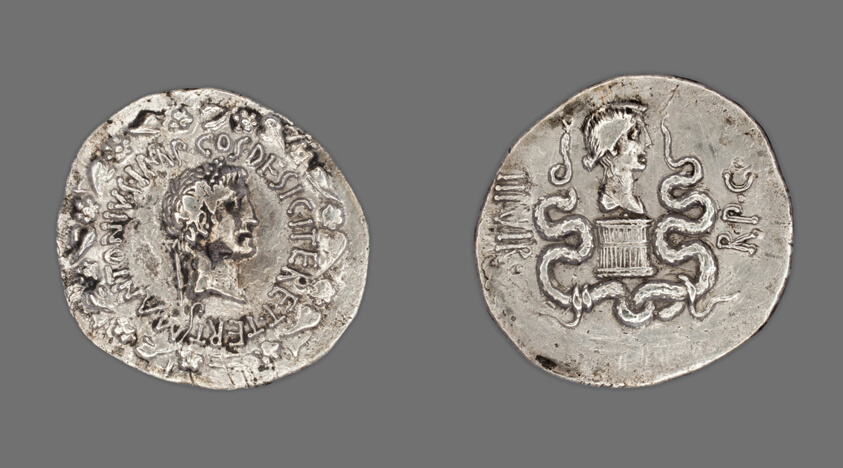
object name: Coin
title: Cistophoric Tetradrachm (Coin) Portraying Mark Antony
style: roman (ancient, style or period), ancient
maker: Roman, probably minted in Ephesus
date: 39-38 BCE, issued by Mark Antony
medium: Silver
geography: Roman Empire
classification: coin; ancient art